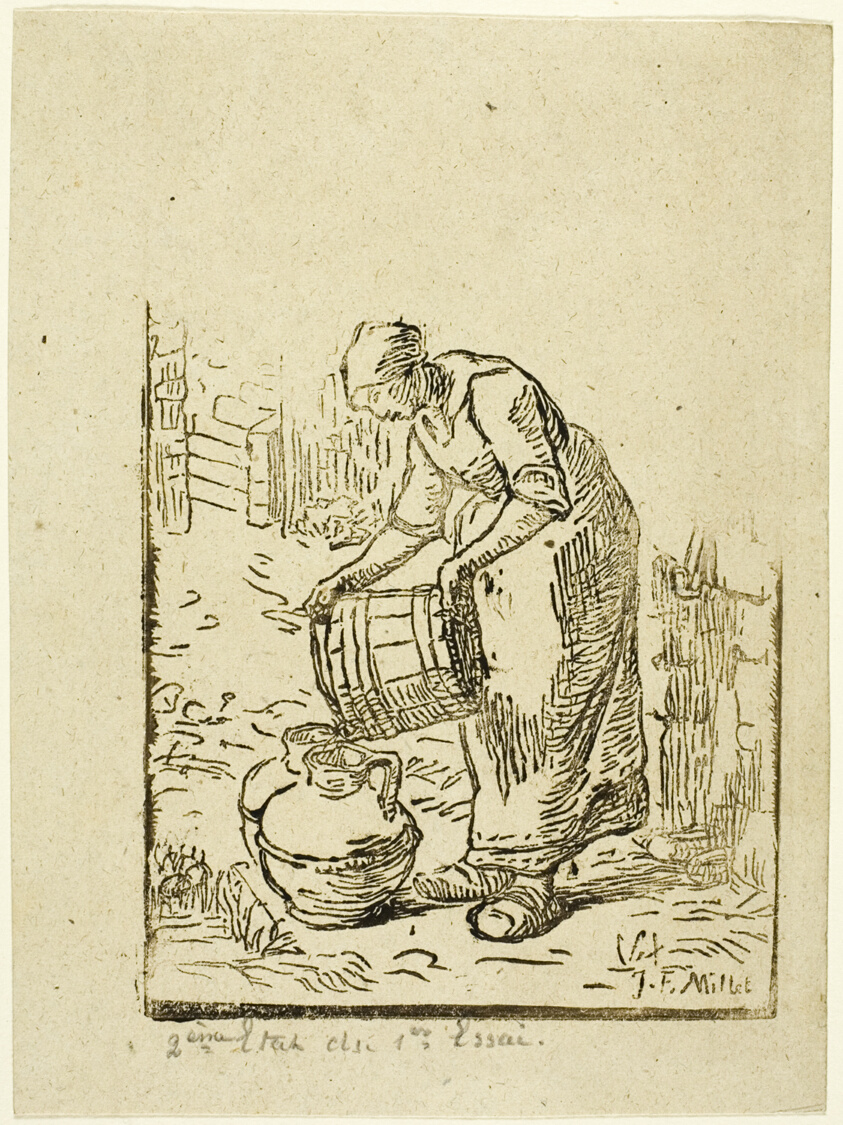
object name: Print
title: Woman Filling Water-Cans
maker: Pierre Millet (French, 1833-1914); after Jean François Millet (French, 1814-1875)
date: 1854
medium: Woodcut from a partially inked block in dark brown on buff wove China paper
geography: France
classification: woodcut; print; prints and drawing